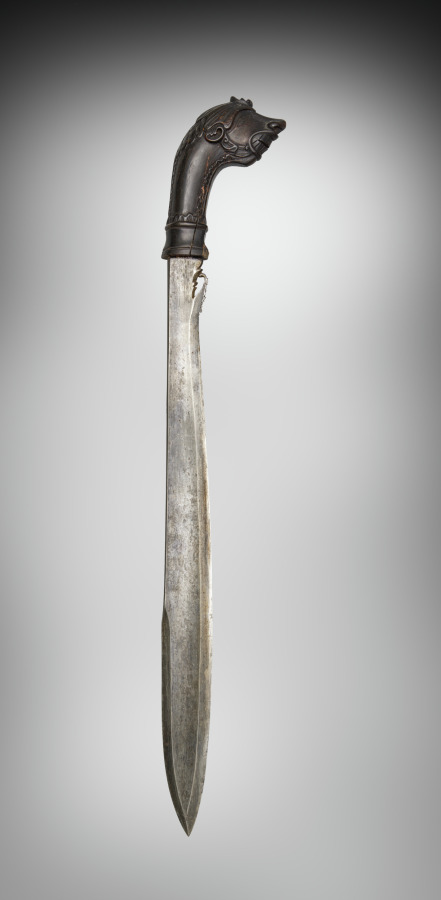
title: Sword and Scabbard (sword)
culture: Java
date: 1700s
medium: steel and ivory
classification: Arms and Armor